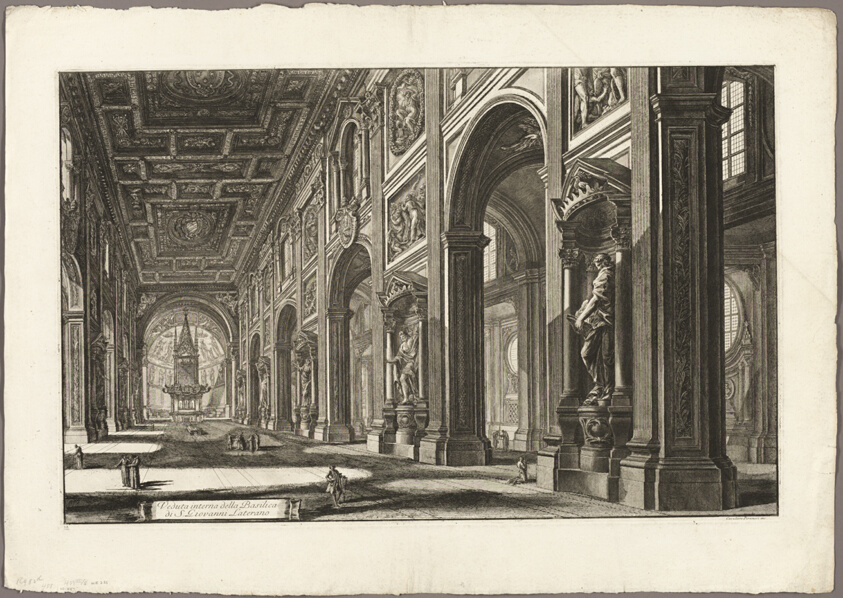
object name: Print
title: Interior view of the Basilica of St. John Lateran, from Views of Rome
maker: Giovanni Battista Piranesi (Italian, 1720-1778)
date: 1768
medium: Etching on heavy ivory laid paper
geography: Italy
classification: etching; print; prints and drawing